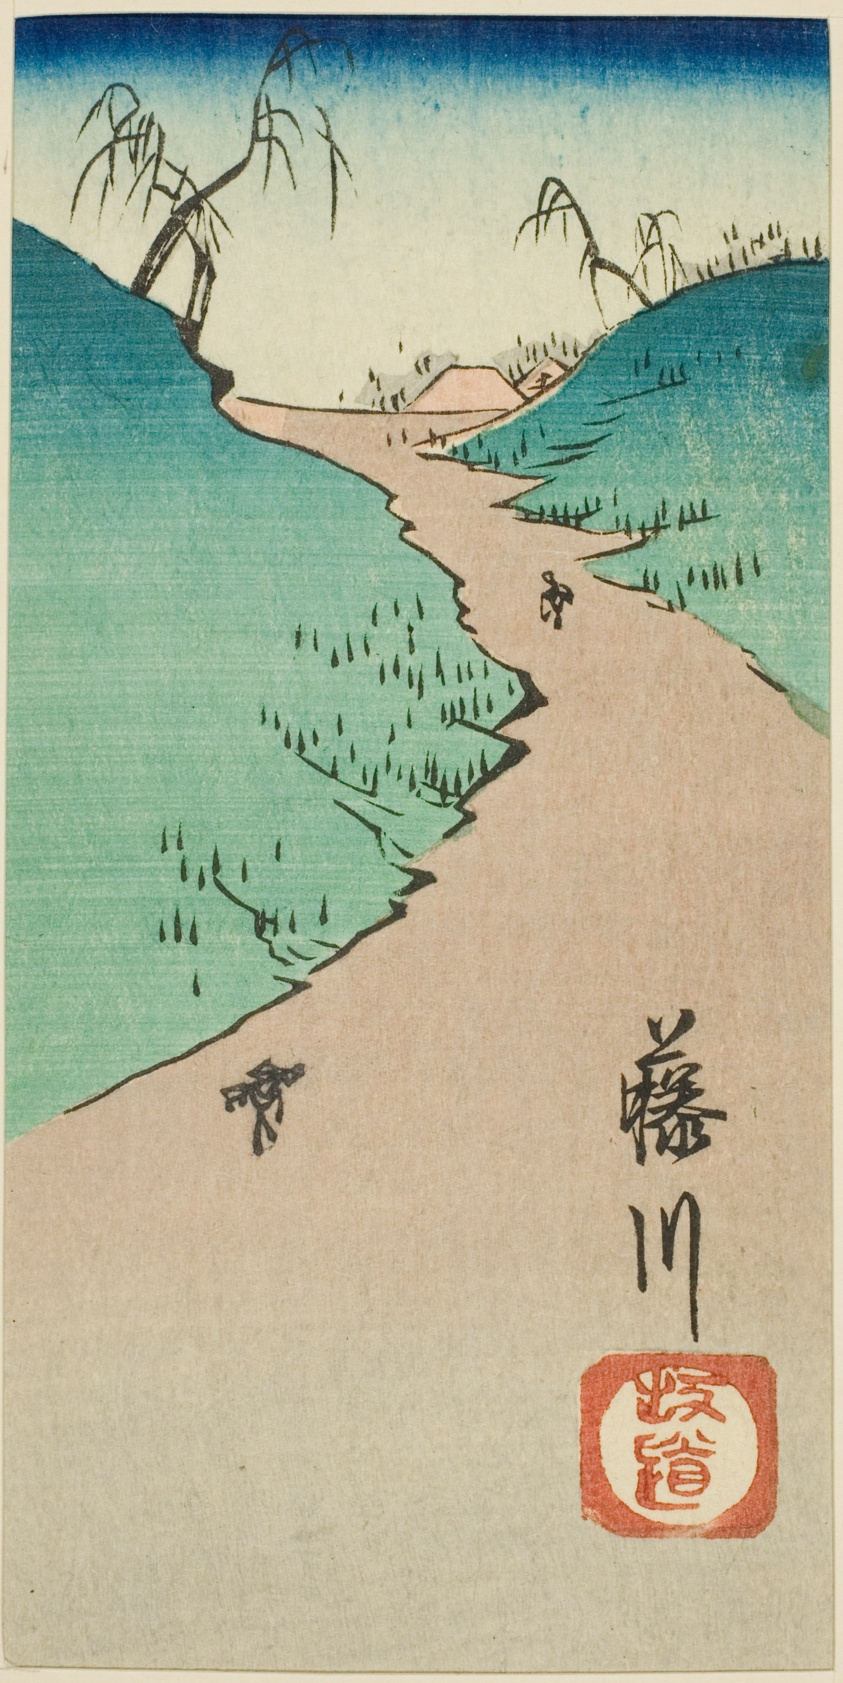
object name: Print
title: Hill at Fujikawa (Fujikawa sakamichi), section of sheet no. 10 from the series "Cutouts of the Fifty-three Stations (Gojusan tsugi harimaze)"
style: Japanese (culture or style)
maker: Utagawa Hiroshige 歌川 広重; Japanese, 1797-1858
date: 1852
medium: Color woodblock print; section of harimaze sheet (uncut sheet: 1939.1296)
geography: Japan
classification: woodblock print; print; asian art